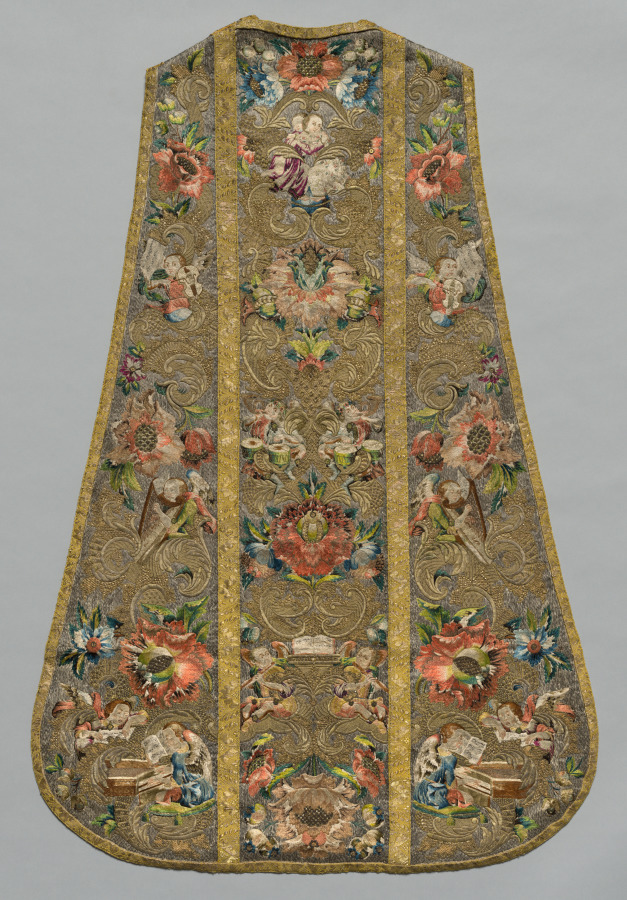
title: Chasuble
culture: Germany, Bavaria, last quarter of 17th century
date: 1675–99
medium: Silk and metallic threads on silk tabby sewn down on a linen tabby ground; embroidery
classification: Embroidery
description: This rare chasuble decorated with angels, musicians, pomegranates, and flowers represents Sacred and Profane Love. This is indicated by two figures—a clear-sighted figure embracing a blindfolded figure—standing on a globe in the upper center and also by the musicians. The angels play soft-sounding instruments (harpsichords, harps, viole da barccio, and flutes) while earthy figures play loud instruments (tambours and hunting horns). The chasuble was most likely part of a liturgical set commissioned for a wedding. This entire chasuble is embroidered with silk and metal thread laid over linen and stitched in place. The exceptionally fine workmanship, lavish use of gold and silver, and brilliant silk thread create this sumptuous vestment.